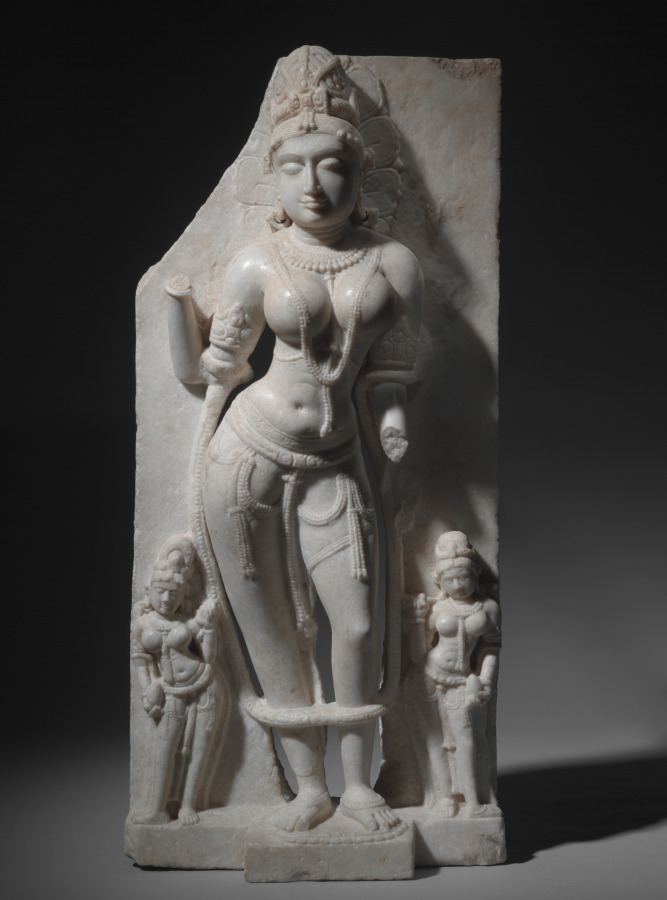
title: Vidyadevi (Goddess of Learning)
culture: India, Western Rajasthan, 10th-11th century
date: 900s-1000s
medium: marble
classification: Sculpture